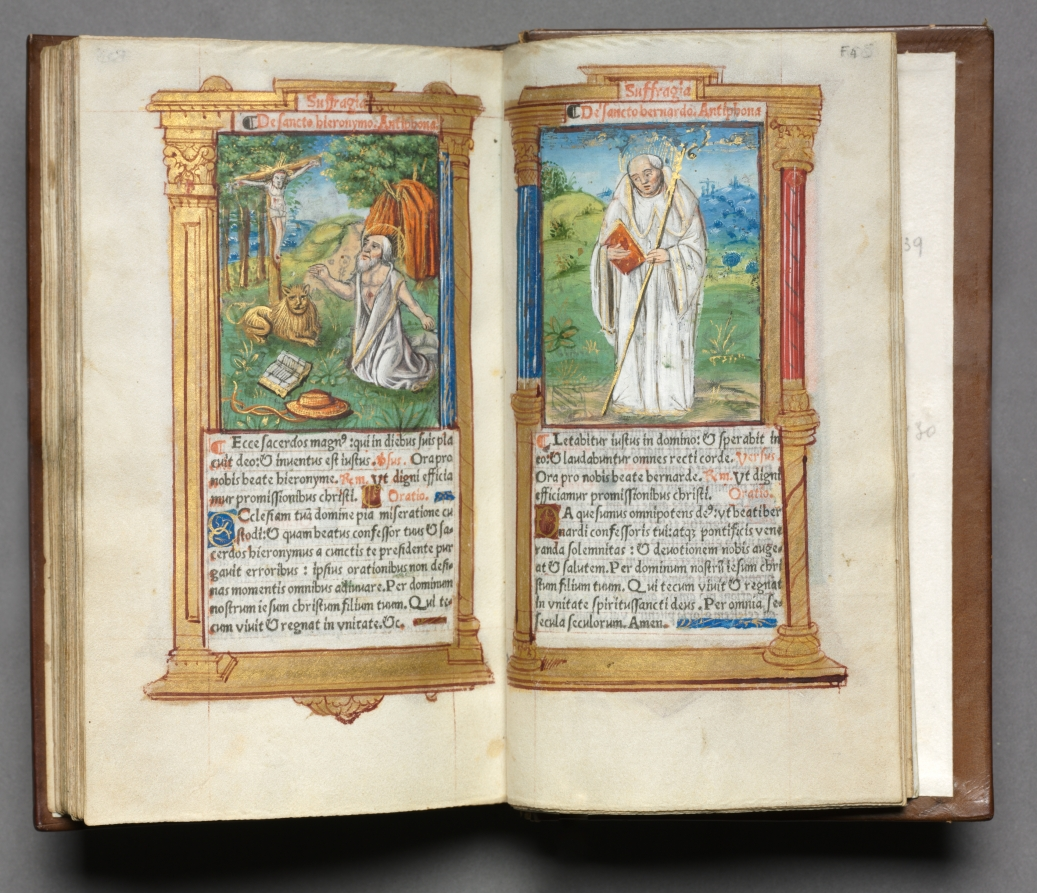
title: Printed Book of Hours (Use of Rome): fol. 107v, St. Jerome and the Lion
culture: France, Paris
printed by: Guillaume Le Rouge (French, Paris, active 1493–1517)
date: 1510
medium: 112 Printed folios on parchment, bound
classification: Bound Volume